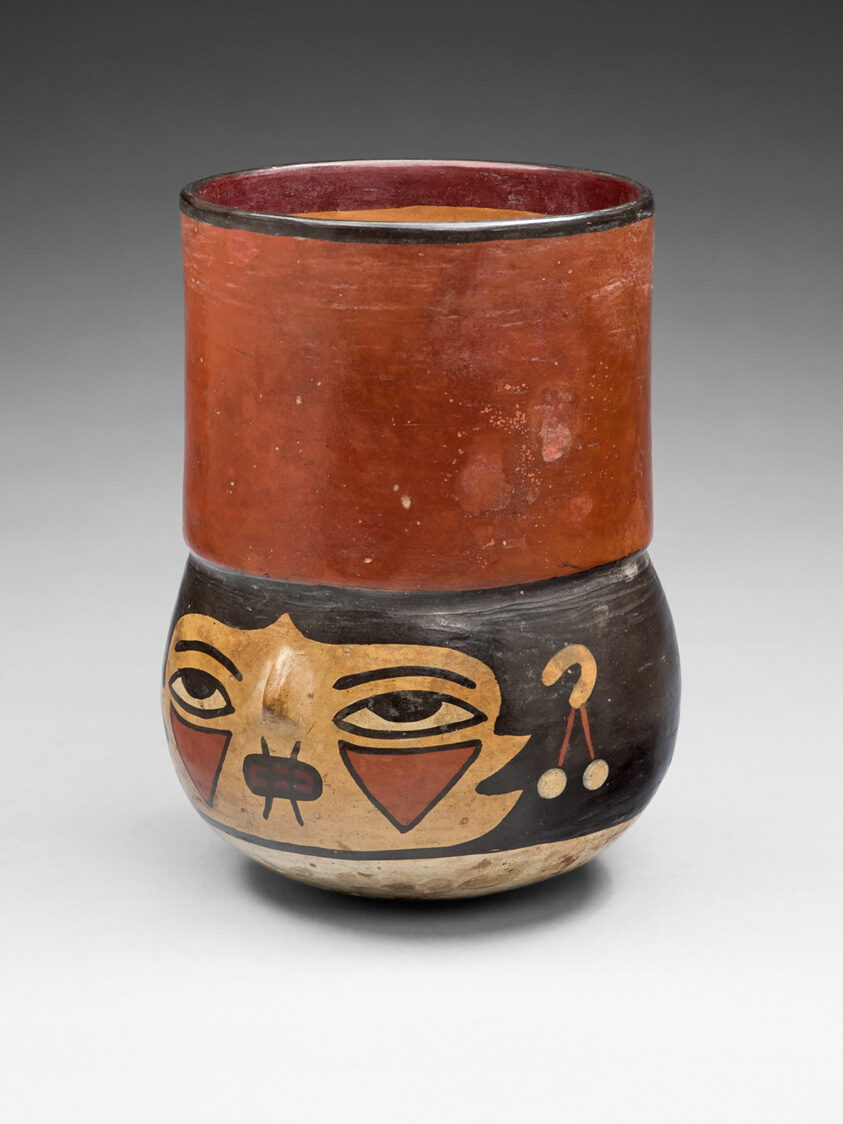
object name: Vessel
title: Beaker in the Form of a Trophy Head with Bound Lips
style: nazca, early intermediate period, Pre-Columbian, americas, Arts of the Americas, andean, andes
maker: Nazca; South coast, Peru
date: 180 BCE–500 CE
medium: Ceramic and pigment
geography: Peru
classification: earthenware; art of the americas; ceramics; vessel